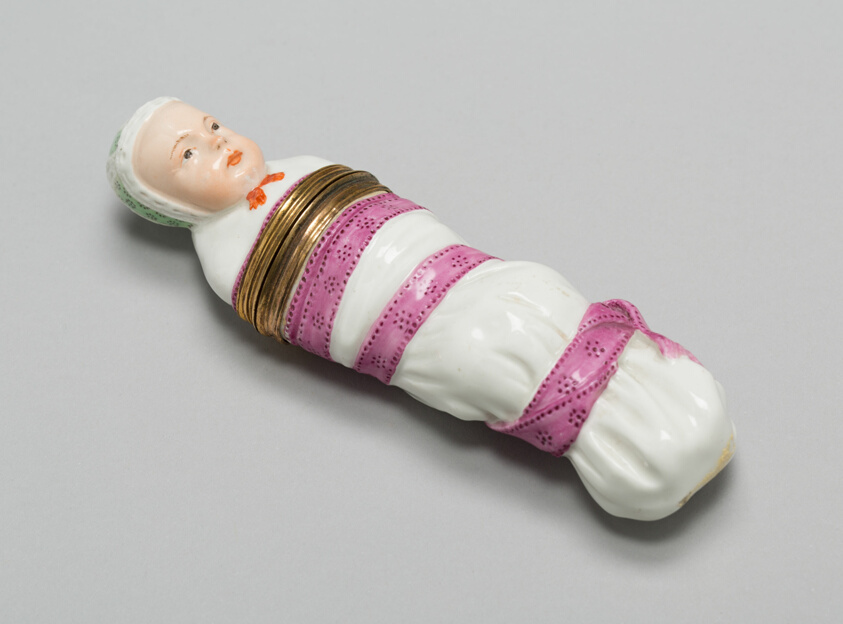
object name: Metalwork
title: Etui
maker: Fürstenberg Porcelain Factory (Germany, founded 1747)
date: c. 1770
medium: Porcelain and gold mount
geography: Fürstenberg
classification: enamel; metalwork